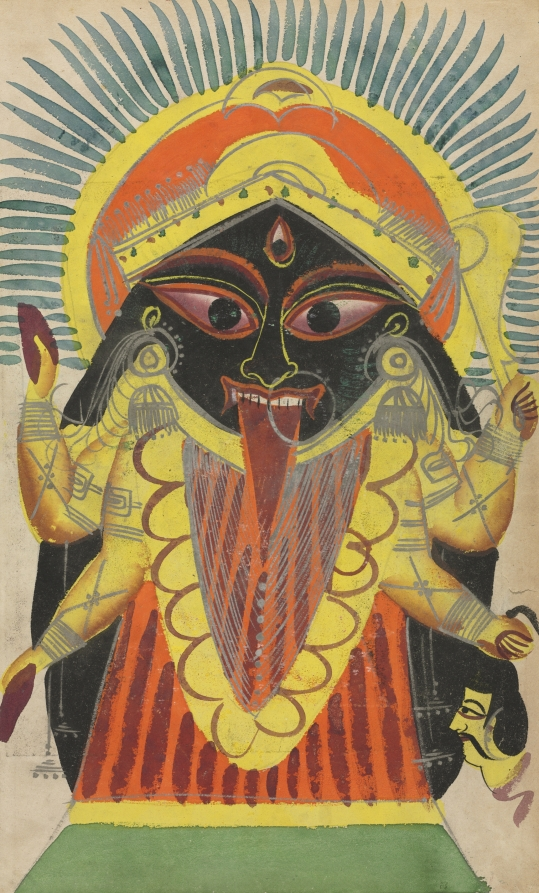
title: The Goddess Kali (recto), from a Kalighat album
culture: Eastern India, Bengal, Kolkata, Kalighat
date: c. 1890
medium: Gum tempera, graphite, ink, and tin on paper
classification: Painting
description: Black-skinned, four-armed, her tongue out, and blood dripping from her mouth, Kali has a third eye—representative of enlightened or divine knowledge—on her forehead. Simultaneously benevolent and dangerous, she holds a sword and a demon’s severed head in two hands while the other two hands are in gestures of protection and blessing. This image would have been sold as a pilgrim souvenir to both locals and the colonial British around the Kalighat temple and is a replica of the image worshipped inside the temple. The frightening image of Kali especially fit into the colonial imagination and into Victorian popular culture and would have been an iconic souvenir/artifact to be shown to intrigued and horrified friends at home in England.